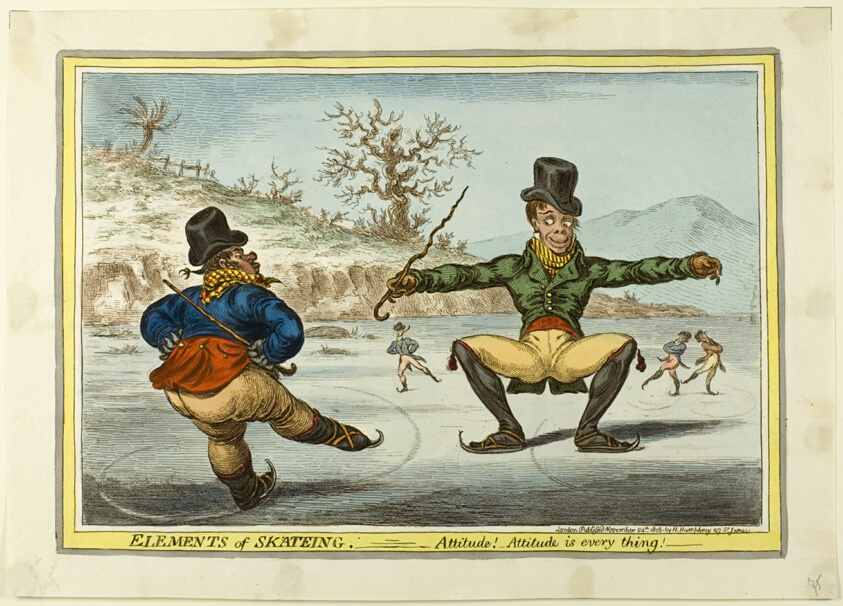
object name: Print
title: The Elements of Skating: Attitude is Everything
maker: James Gillray (English, 1756-1815); published by Hannah Humphrey (English, c. 1745-1818)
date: published November 24, 1805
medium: Hand-colored etching, slightly aquatinted on paper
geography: England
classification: etching; print; prints and drawing